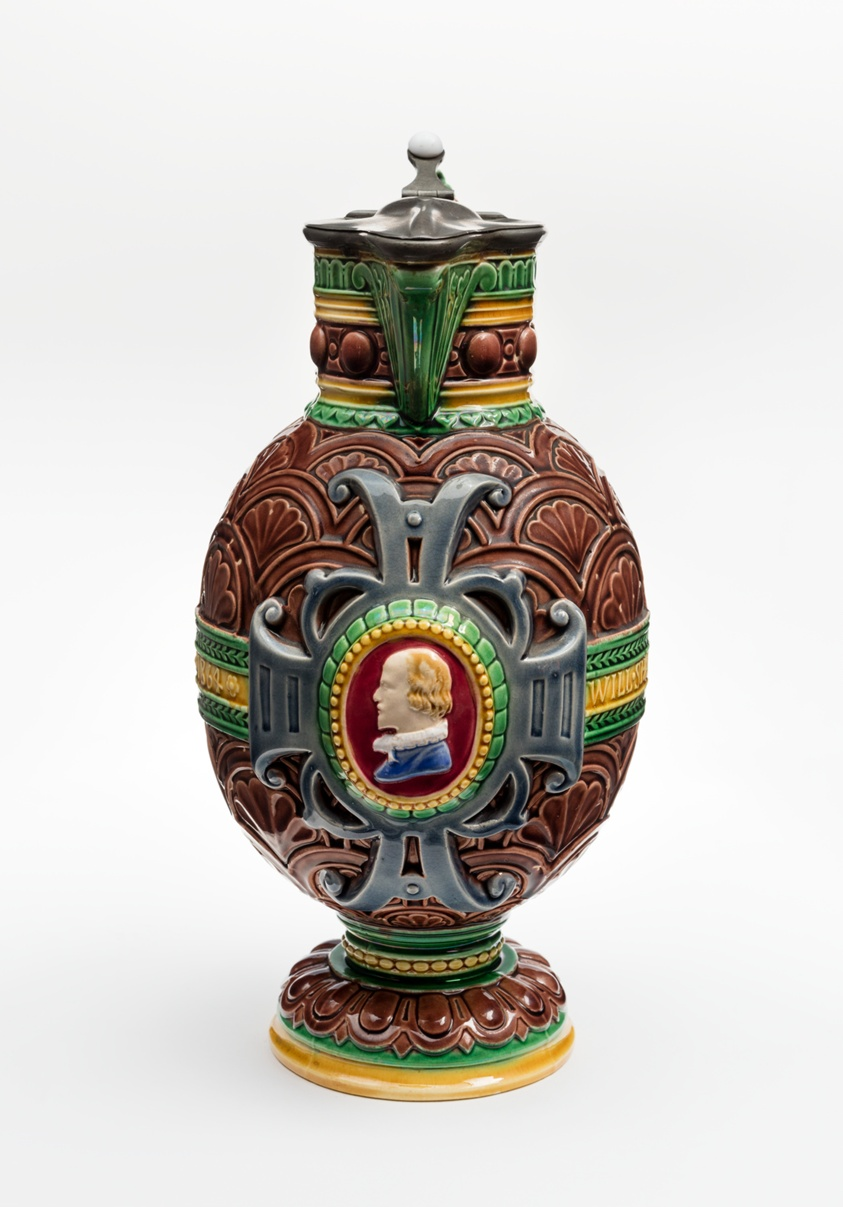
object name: Ceramics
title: Shakespeare Ewer and Basin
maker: Minton Pottery and Porcelain Factory; Stoke-on-Trent, England, founded 1793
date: Ewer: 1873, Basin: 1871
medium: Tin glazed earthenware with pewter mounts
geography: England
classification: ceramics